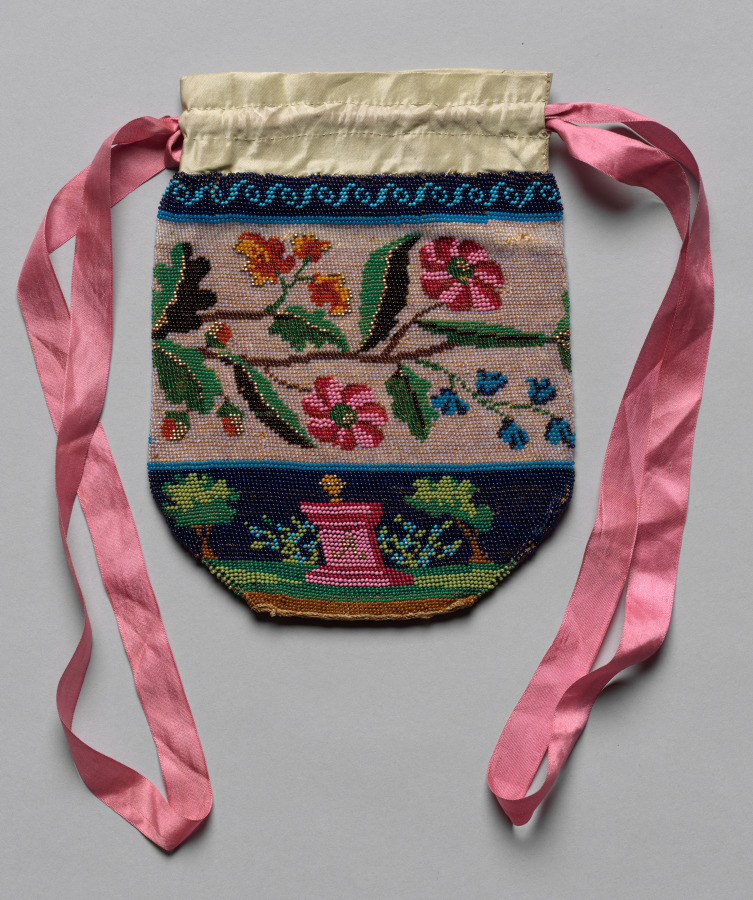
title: Beaded Bag (floral motif)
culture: America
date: 19th century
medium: silksatin, glass beads, pink ribbon strap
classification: Garment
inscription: grave monument with initial "A" on it; cream leather lining signed: "Sarah W. Baker."